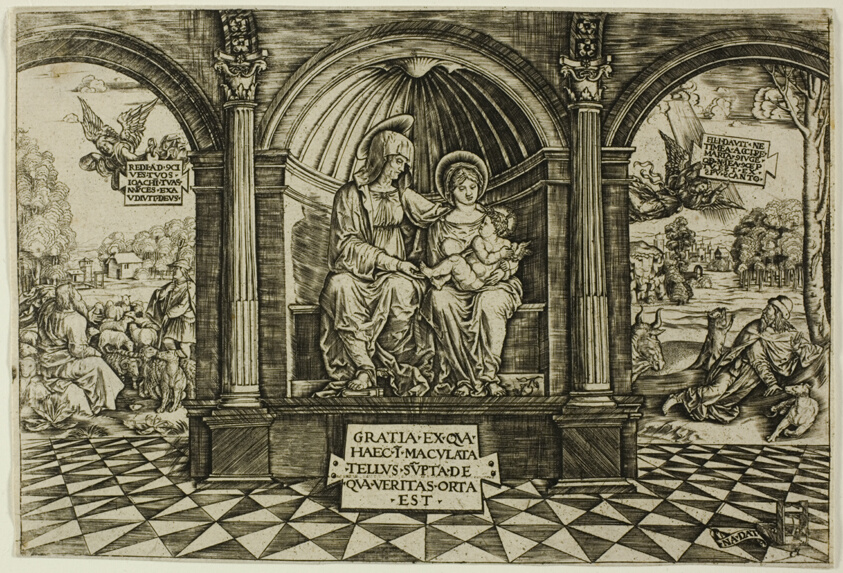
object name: Print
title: The Virgin and Child Enthroned with Saint Anne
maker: Master NA. DAT with the Mousetrap; Italian, active c. 1500-after 1511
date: 1512/13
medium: Engraving, on paper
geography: Italy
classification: engraving; print; prints and drawing